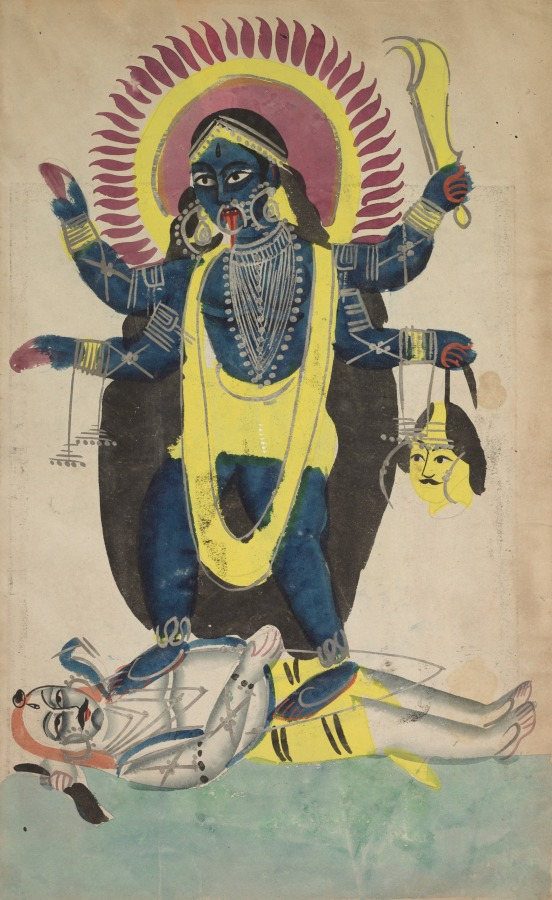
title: Kali Dancing on Shiva (recto), from a Kalighat album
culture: Eastern India, Bengal, Kolkata, Kalighat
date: c. 1890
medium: Gum tempera, graphite, and ink on paper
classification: Painting